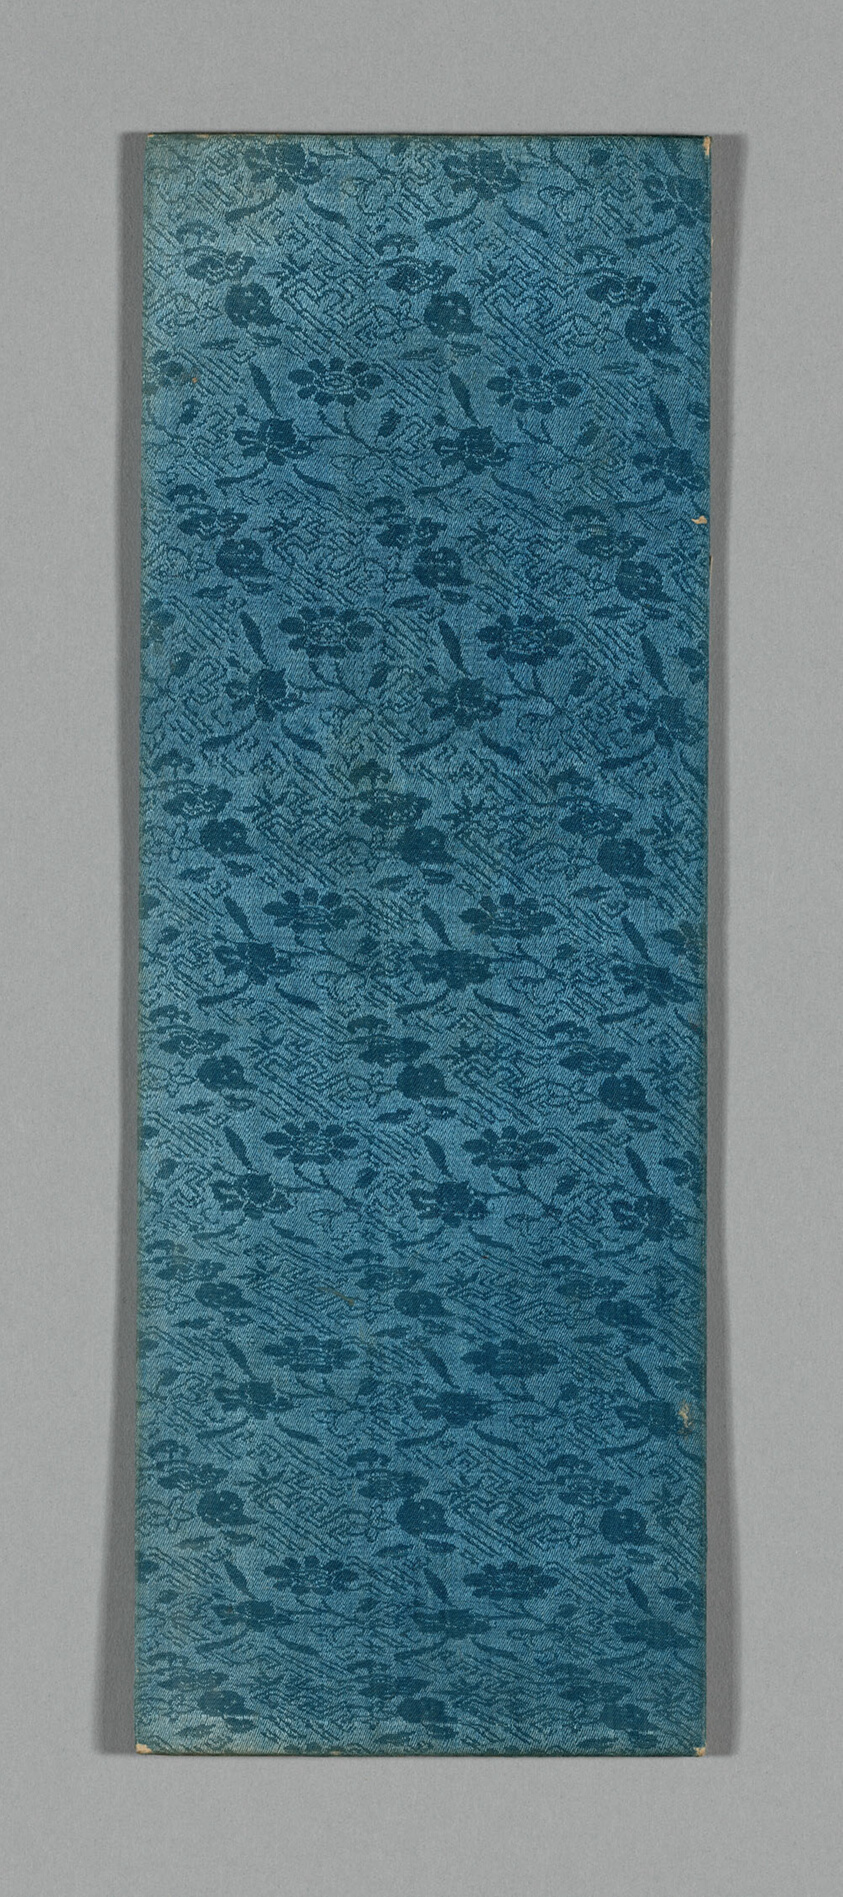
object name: Textile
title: Sutra Cover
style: ming, Chinese (culture or style), East Asian, asian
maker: China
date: Ming dynasty (1368–1644), c. 1590's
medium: Silk, 3:1 twill damask weave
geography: China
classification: textile; weaving